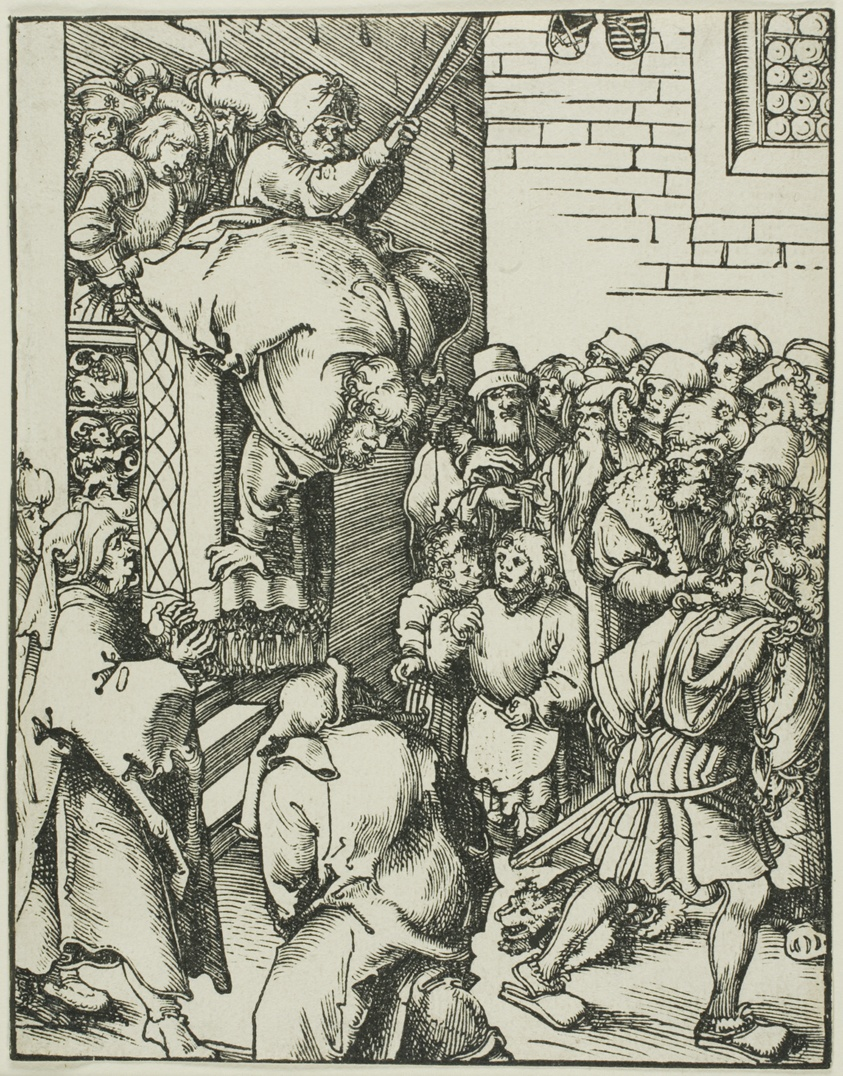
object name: Print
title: Saint James the Less, The Martyrdom of the Apostles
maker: Lucas Cranach the Elder (German, 1472-1553)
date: c. 1512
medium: Woodcut in black on ivory laid paper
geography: Germany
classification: woodcut; print; prints and drawing